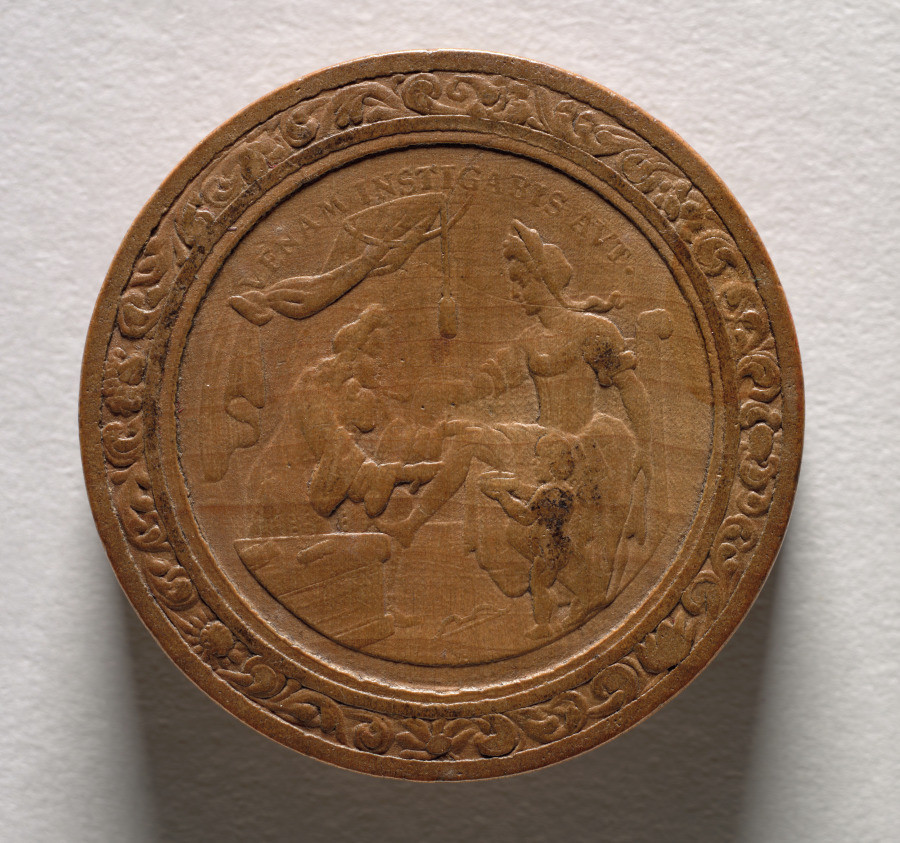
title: Gaming Piece (reverse)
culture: Germany, late 17th-early 18th Century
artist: Martin Brunner (German, 1659–1725)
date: c.1700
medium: wood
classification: Furniture and woodwork